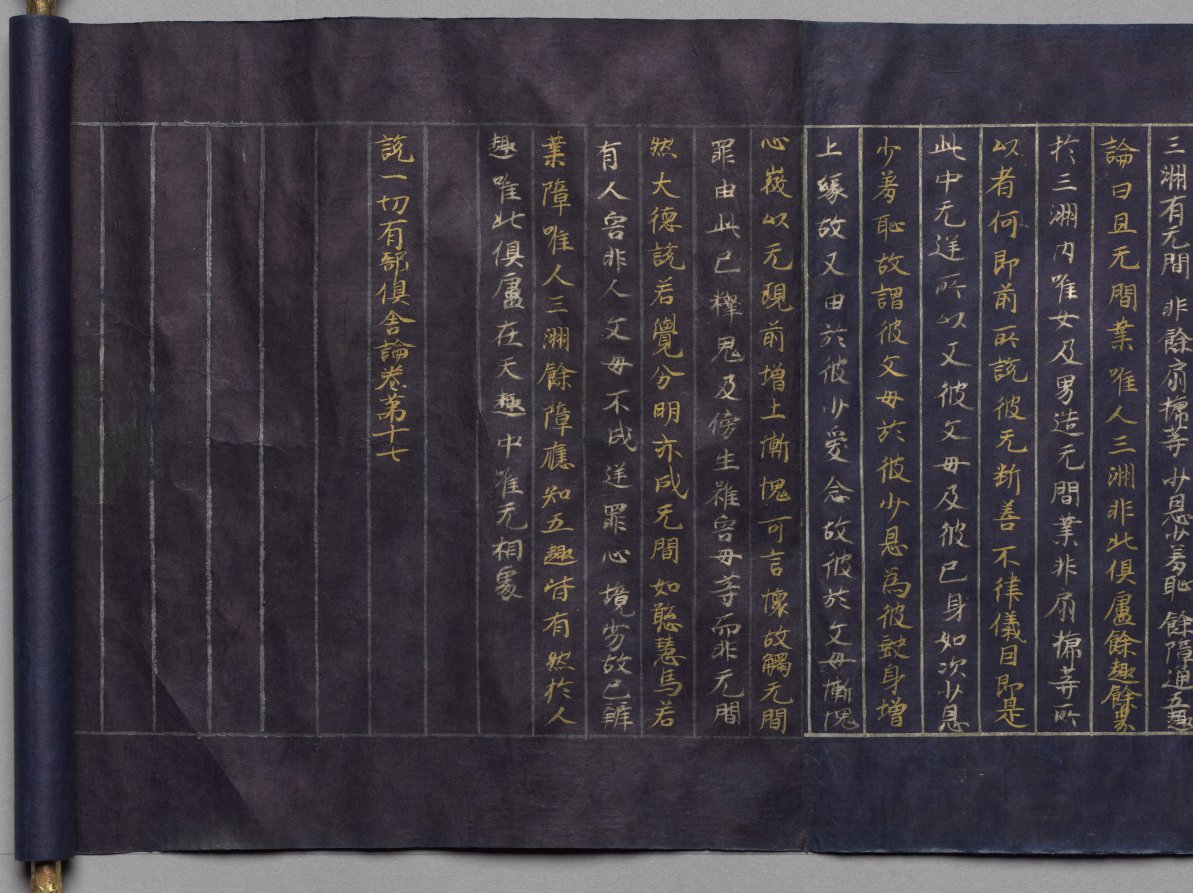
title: Meta-Discourse on the Teachings from the Treasury (Abidharmakosha-Bhashya)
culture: Japan, Heian period (794–1185)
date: 1100s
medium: handscroll; gold and silver on indigo-dyed paper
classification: Manuscript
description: This religious text relates some of the teachings of the great fourth-century Indian Buddhist scholar Vasubhandhu. The text analyzes human consciousness in its relationship to the environment and transformations that occur during meditation. This scroll is the 17th part of a 30-part translation of the text by Xuanzang, an eminent seventh-century Chinese monk.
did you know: The frontispiece depicts the Buddha Shakyamuni preaching in a paradisical landscape.